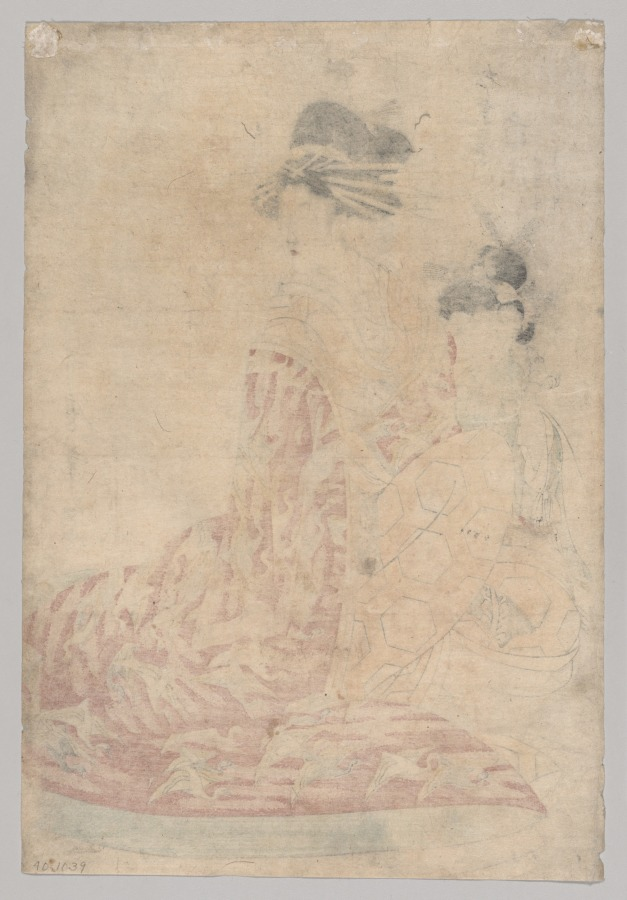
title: Ichikawa of Matsubaya with Minomo and Tamamo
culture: Japan, Edo period (1615–1868)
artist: Kitagawa Utamaro (Japanese, c. 1754–1806)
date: 1753–1806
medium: color woodblock print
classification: Print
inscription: Signature: Utamaro fude Publisher Seal: Omi-ya